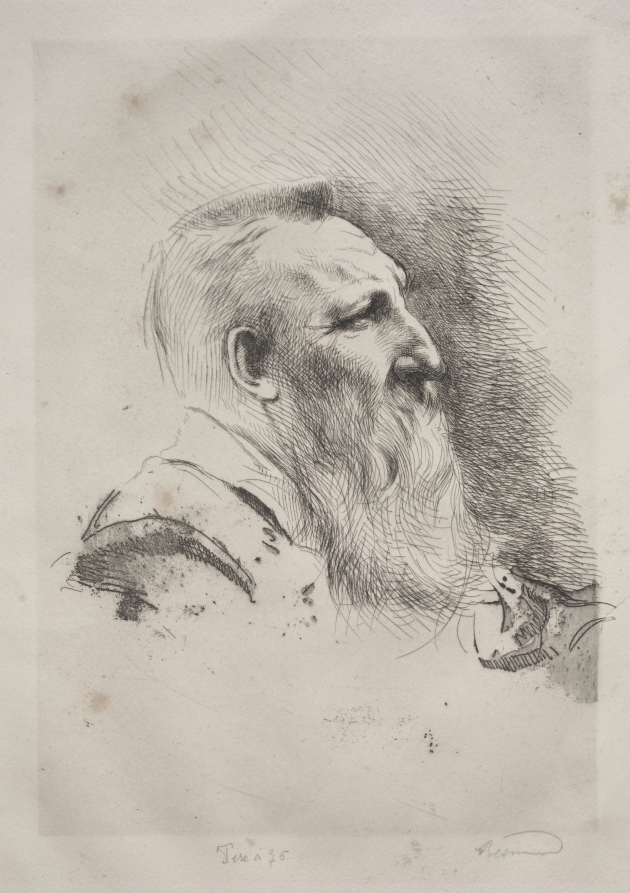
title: Auguste Rodin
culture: France, 19th-20th Century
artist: Albert Besnard (French, 1849–1934)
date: 1900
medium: etching and drypoint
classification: Print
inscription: signed, in graphite, lower right (within platemark): Besnard lower center, in graphite (within platemark): Tire à 75